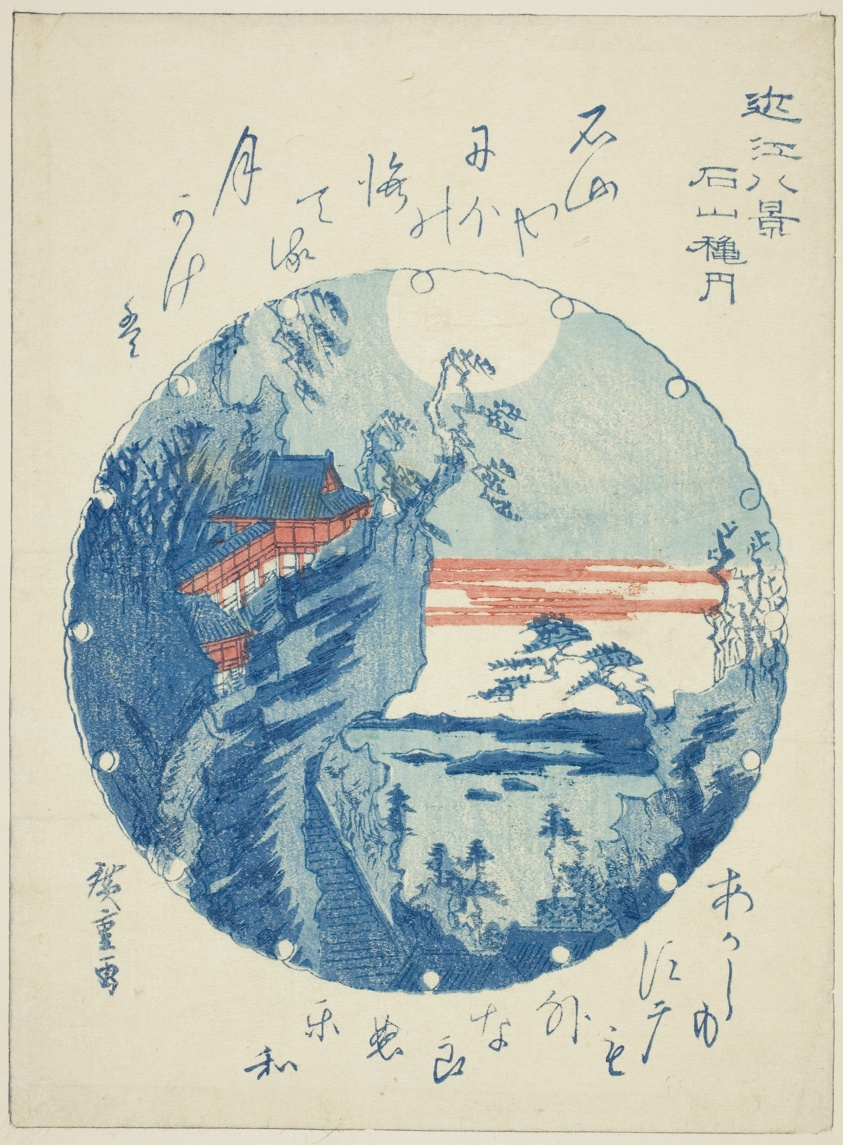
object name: Print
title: Autumn Moon at Ishiyama (Ishiyama shugetsu), from the series "Eight Views of Omi (Omi hakkei)"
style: Japanese (culture or style)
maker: Utagawa Hiroshige 歌川 広重; Japanese, 1797-1858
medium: Color woodblock print; chuban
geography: Japan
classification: woodblock print; print; asian art